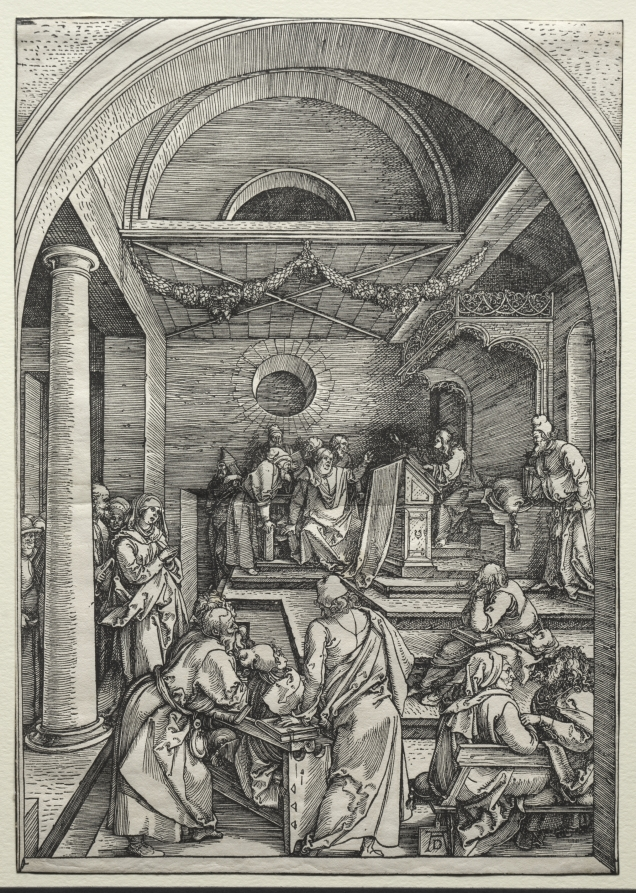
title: Christ Disputing with Doctors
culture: Germany, early 16th Century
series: The Life of the Virgin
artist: Albrecht Dürer (German, 1471–1528)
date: c. 1503–1504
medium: woodcut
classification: Print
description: These two woodcuts (1959.99.16-17) feature events that overlap in both Mary’s and Jesus’s lives. The first is a scene in which Mary finds Jesus, after days of searching, speaking from behind a lectern to the temple’s elders. The second refers to the the moment Mary was forced to say goodbye to her son as he leaves for Jerusalem and ultimately on to the events of his Passion. This print represents the most sorrowful episode of the series as Mary kneels, beseeching Jesus to stay.